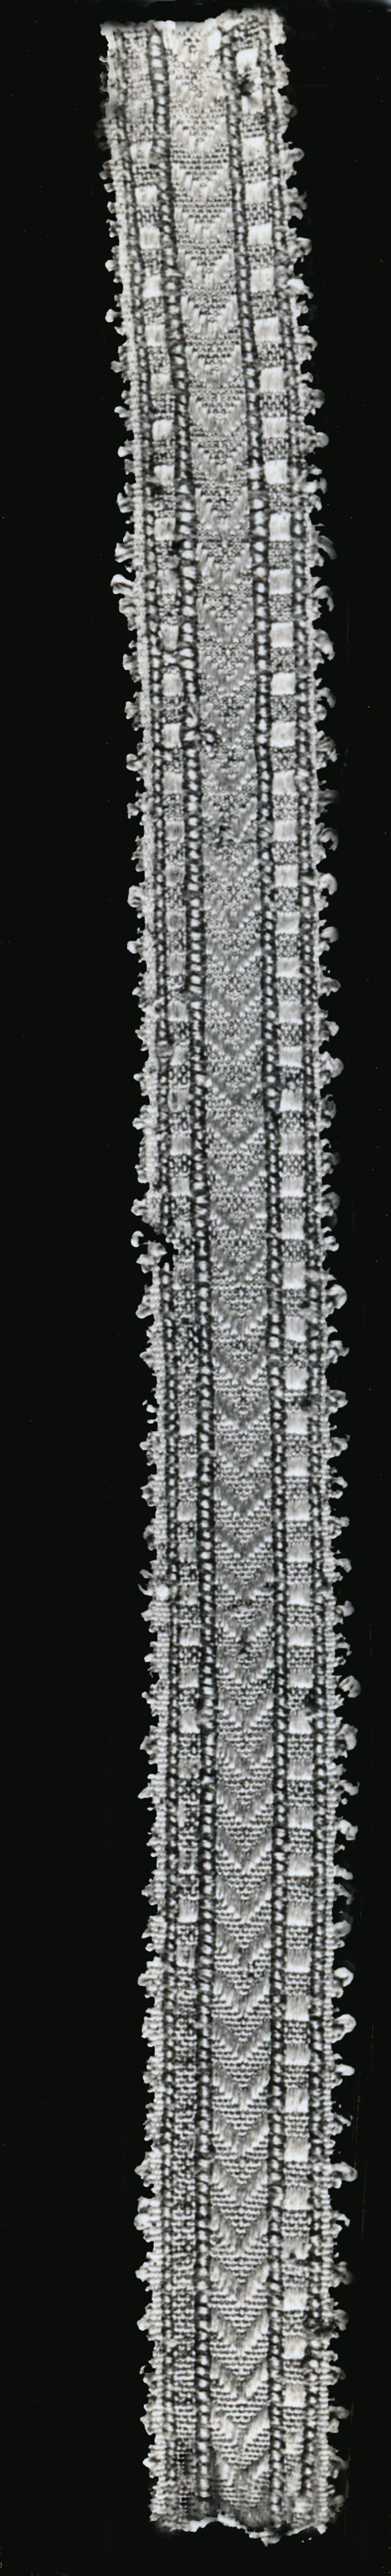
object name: Textile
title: Galloon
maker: Italy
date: 18th century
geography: Italy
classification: textile; weaving